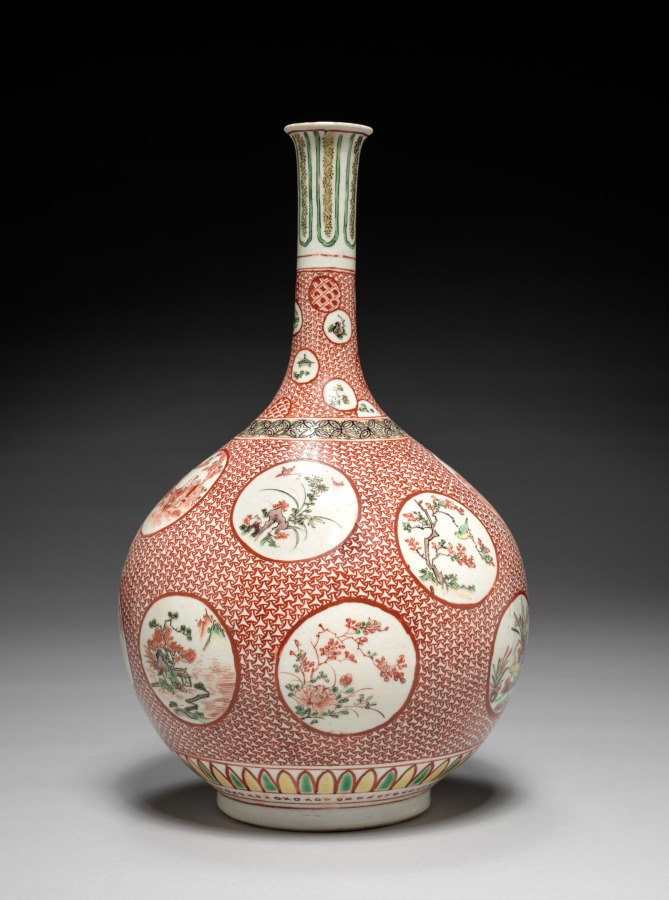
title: Vase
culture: Japan, Edo period (1615–1868)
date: late 1600s-early 1700s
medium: porcelain with decoration in colored enamels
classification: Ceramic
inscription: character "Fuku" (well-being) on base in black with green overglaze.